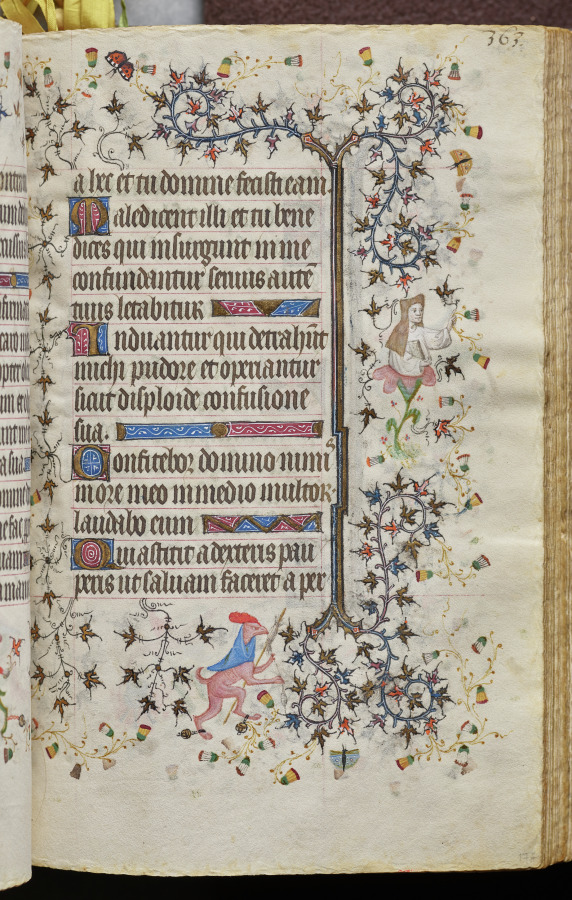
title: Hours of Charles the Noble, King of Navarre (1361-1425): fol. 177r, Text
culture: France, Paris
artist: Master of the Brussels Initials and Associates (French)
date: c. 1405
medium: ink, tempera, and gold on vellum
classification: Bound Volume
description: This precious volume was obviously highly prized by its owner, the French-born King of Navarre, who had his coat of arms painted on no less than twenty folios. Rather than directly commissioning this manuscript from a specific workshop, it seems that Charles the Noble acquired his book of hours -- perhaps ready-made for the luxury market -- while on a trip to Paris in 1404-05. A collaborative effort, six painting styles are evidenced within the pages of this codex, those of two Italians, two Frenchmen, and two Netherlanders. The painter who was responsible for the planning and decoration of the book, and who produced seventeen of the large miniatures, was a Bolognese artist known as the Master of the Brussels Initials. His principal assistant, responsible for most of the borders, was a Florentine who signed his name "Zecho" da Firenze on folio 208 verso.